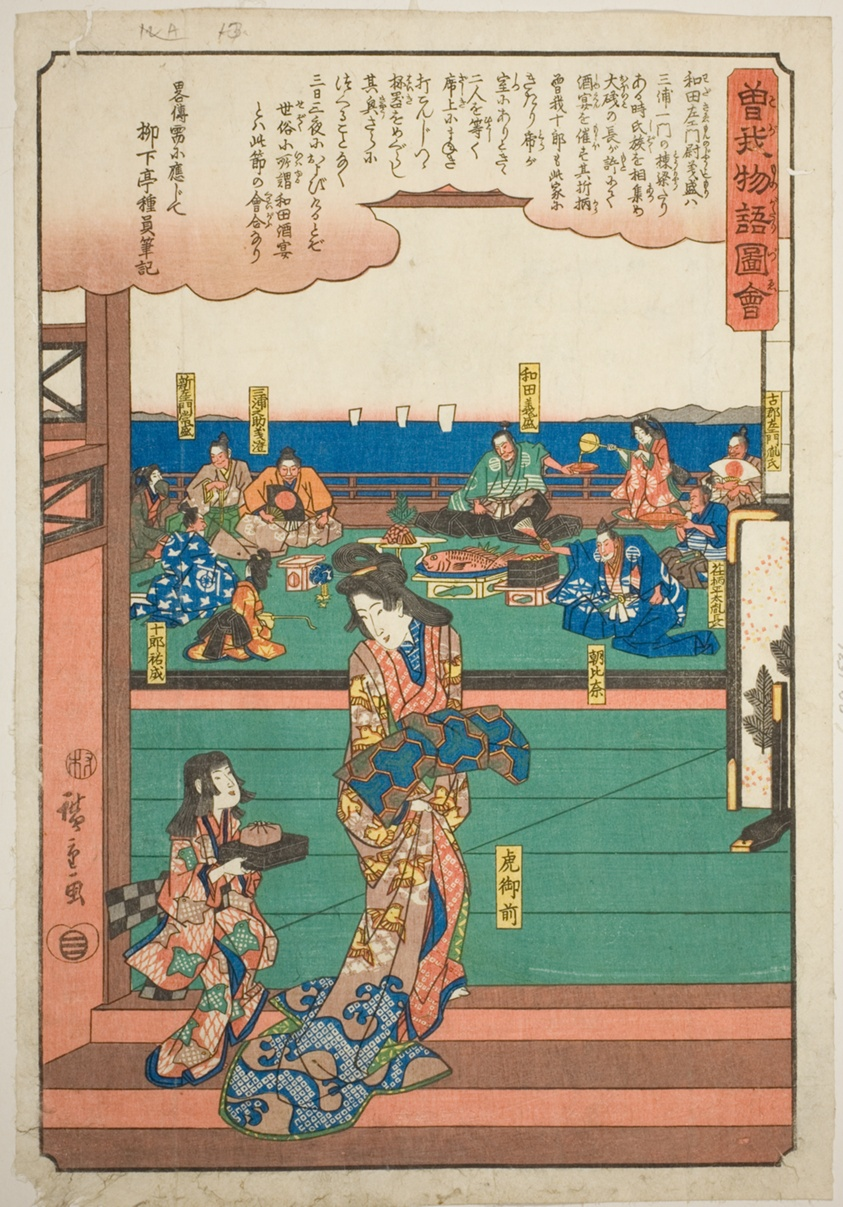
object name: Print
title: Tora Gozen at the banquet of Wada no Yoshimori, from the series "Illustrated Tale of the Soga Brothers (Soga monogatari zue)"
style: Japanese (culture or style)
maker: Utagawa Hiroshige 歌川 広重; Japanese, 1797-1858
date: c. 1843/47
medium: Color woodblock print; oban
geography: Japan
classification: woodblock print; print; asian art